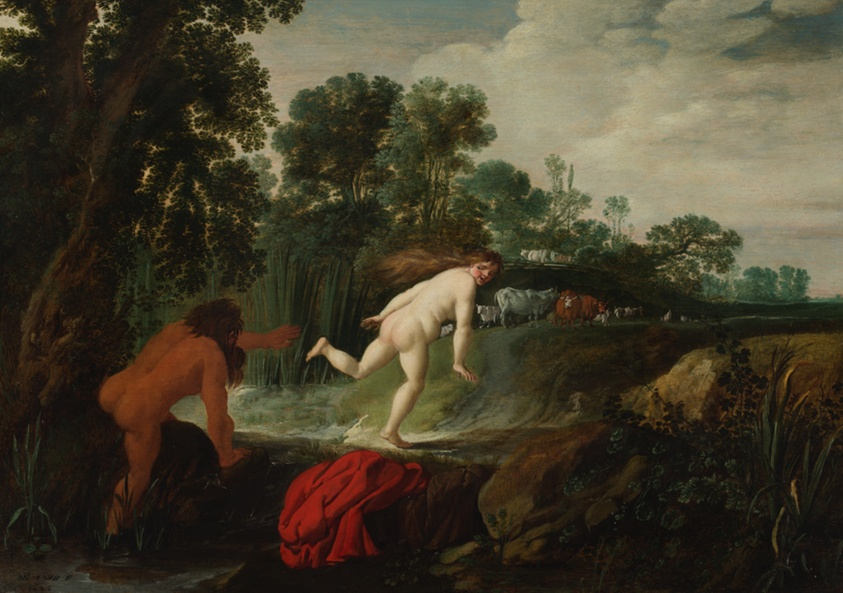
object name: Painting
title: Alpheus and Arethusa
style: 17th Century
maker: Moyses van Uyttenbroeck (Dutch, c. 1590-1648)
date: 1626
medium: Oil on panel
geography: Netherlands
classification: painting; oil on panel; paint; european painting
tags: history, water, landscape, river, mythological figures, pre-Rembrandtists